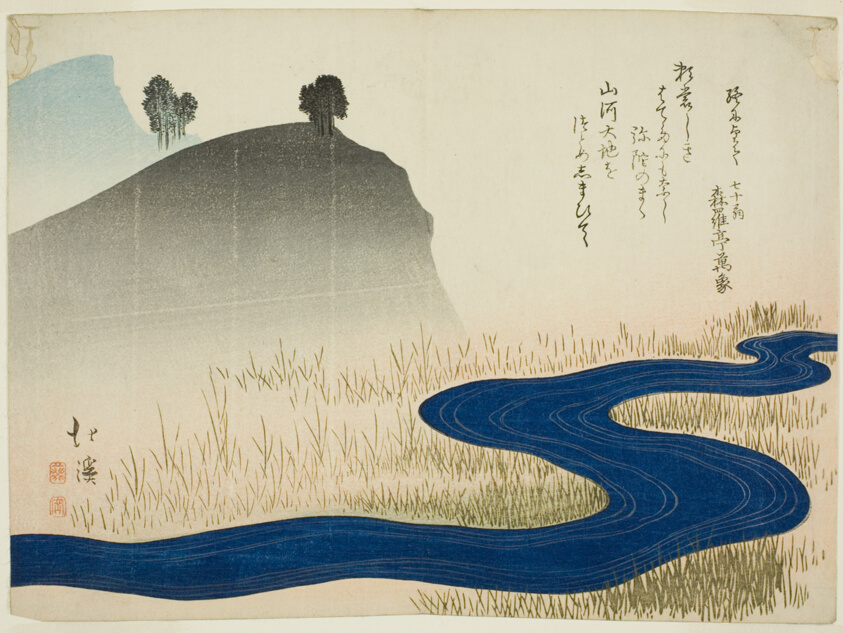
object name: Print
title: A Mountainous Landscape with a Stream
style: Japanese (culture or style)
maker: Totoya Hokkei (Japanese, 1780–1850)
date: 1827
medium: Color woodblock print; chuban, surimono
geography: Japan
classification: woodblock print; print; asian art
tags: landscapes